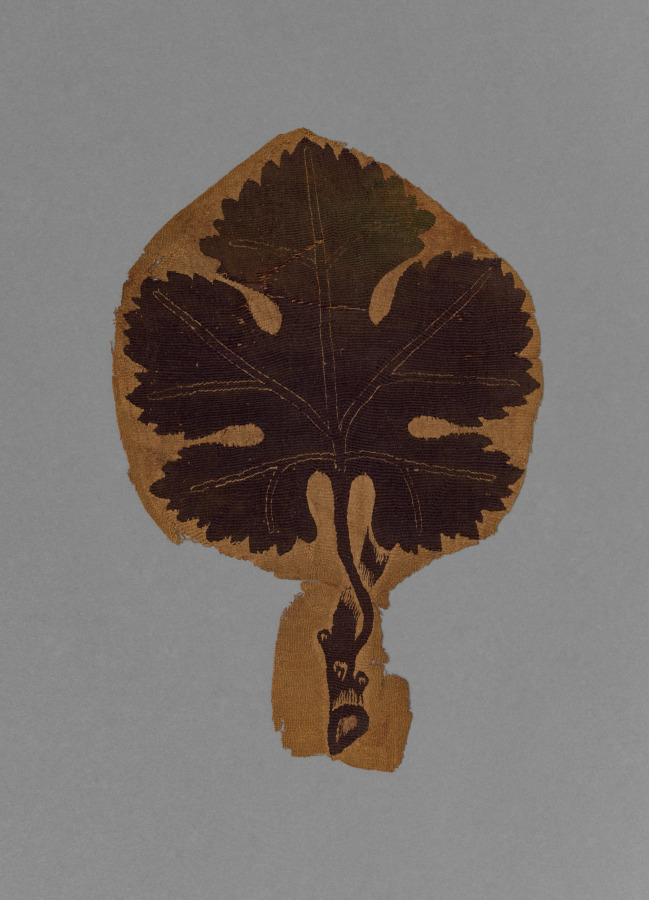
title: Grape Leaf from a Curtain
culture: Egypt, Byzantine period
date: 400s-500s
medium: weft-faced plain weave with tapestry weave and supplementary weft wrapping; undyed linen and dyed wool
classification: Textile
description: This deep-purple grape leaf once decorated the plain linen ground of a curtain. It probably refers to Dionysus, the classical god of wine, whose cult was popular in Egypt through the 6th century.